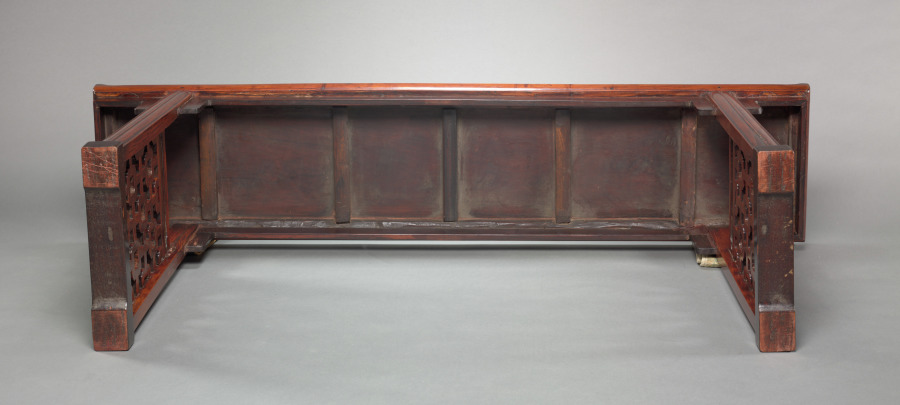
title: Altar Table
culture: China, Ming dynasty (1368–1644)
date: 1368–1644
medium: Rosewood (huanghuali)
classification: Furniture and woodwork